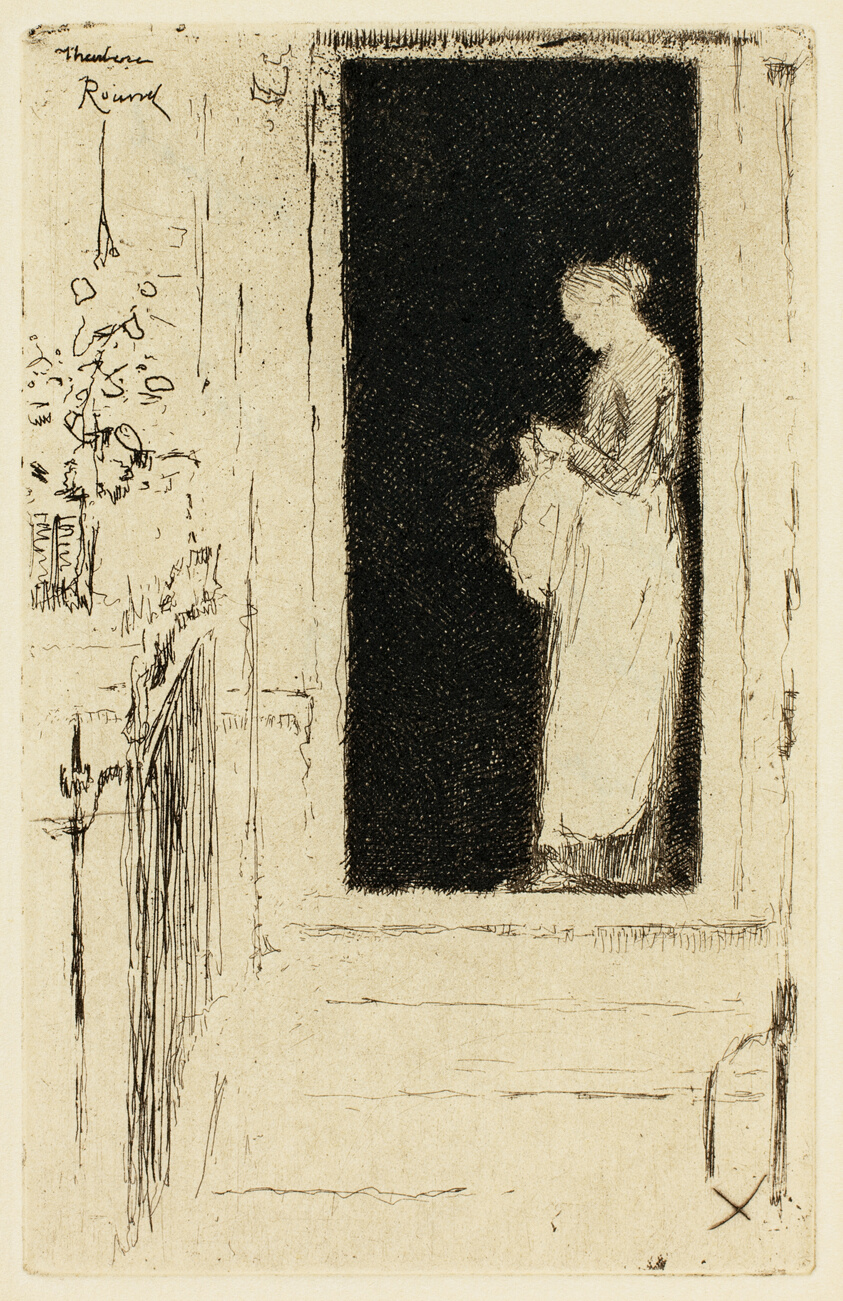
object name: Print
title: Penelope, A Doorway Chelsea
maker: Theodore Roussel (French, worked in England, 1847-1926)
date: 1888–89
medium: Etching in black on cream laid paper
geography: England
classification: etching; paper; print; prints and drawing